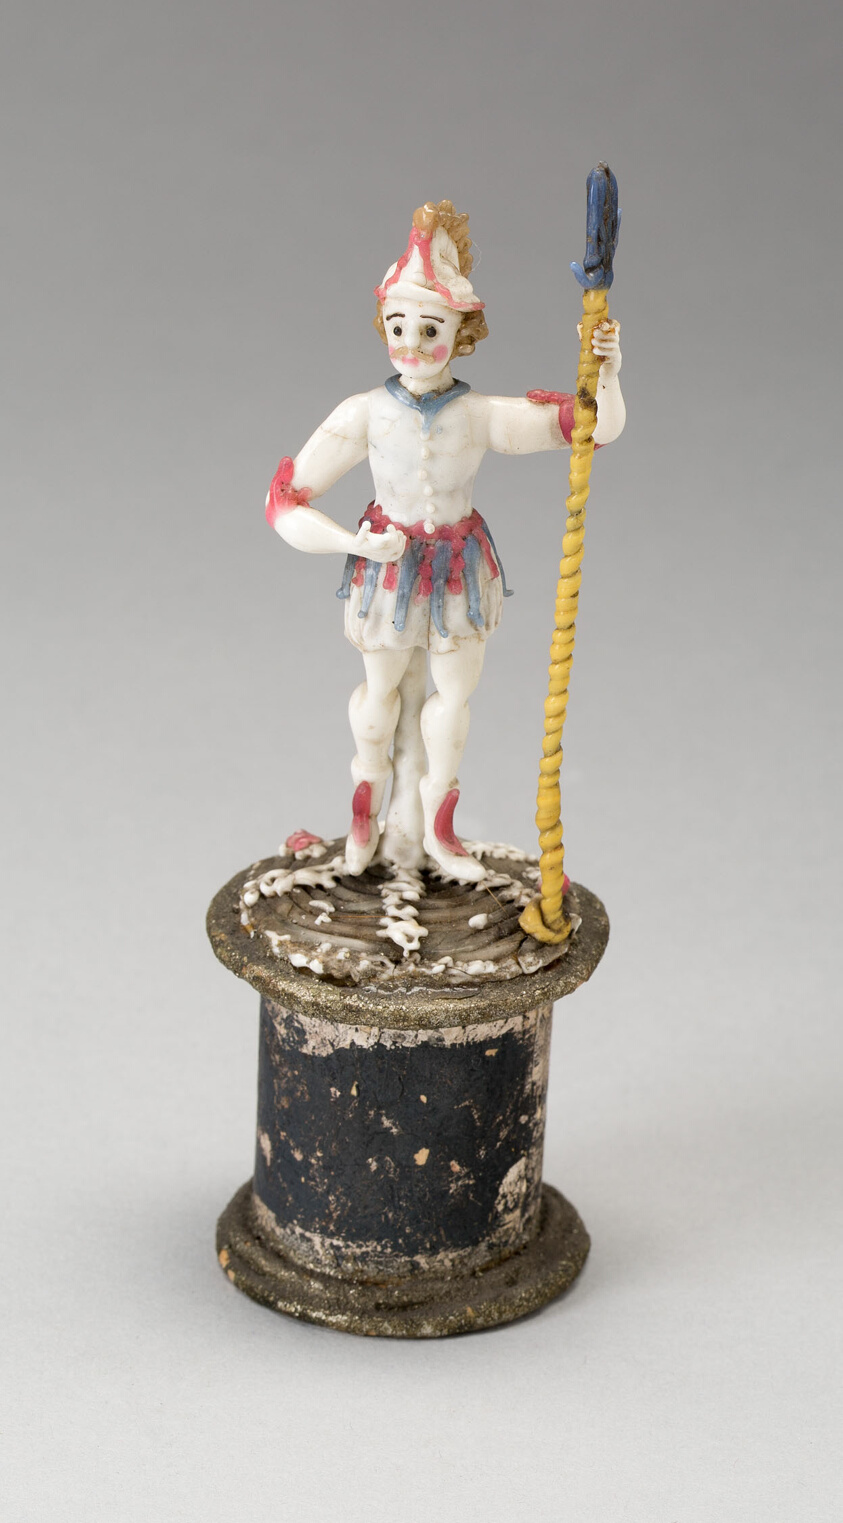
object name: Glass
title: Soldier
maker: Nevers, France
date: 18th century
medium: Glass; lampwork (verre de Nevers), metal armature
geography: France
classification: glass; miniature; decorative object/ornament; european decorative arts